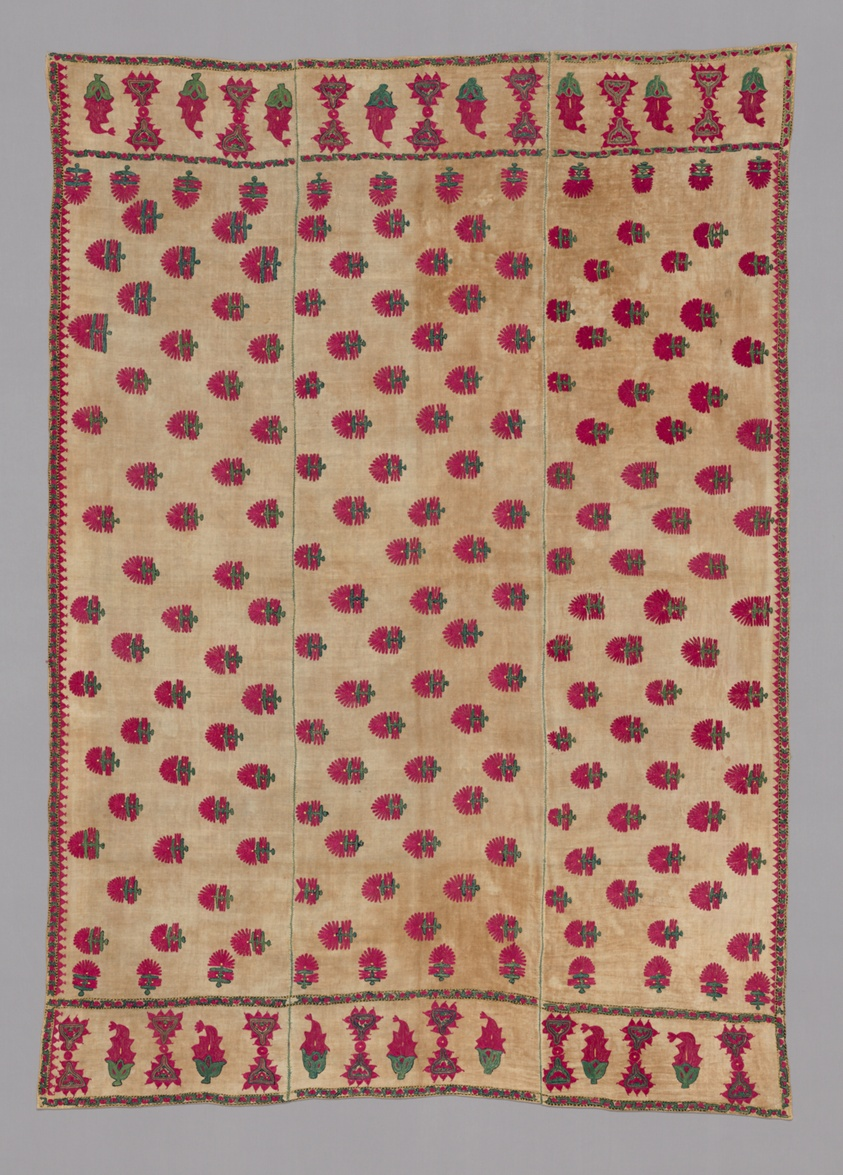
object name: Textile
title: Banquet Cloth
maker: India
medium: Linen ground with red and green silk medallions; embroidered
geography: India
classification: textile; weaving